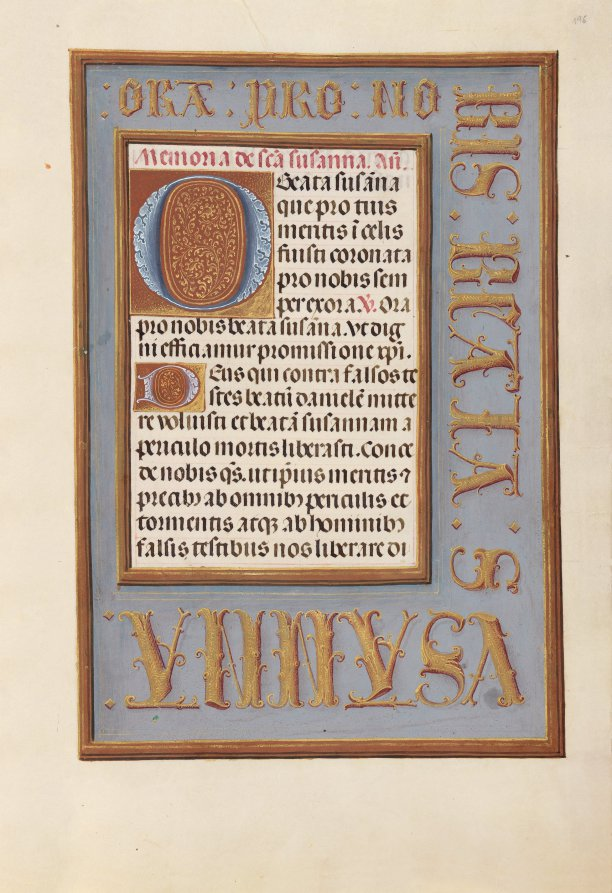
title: Hours of Queen Isabella the Catholic, Queen of Spain: Fol. 196r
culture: Flanders, Ghent and Bruges, late 15th century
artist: Master of the First Prayerbook of Maximillian (Flemish, c. 1444–1519)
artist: and Associates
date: c. 1500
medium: ink, tempera, and gold on vellum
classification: Bound Volume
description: This manuscript was illuminated by a circle of at least five highly organized manuscript painters active in the Flemish cities of Ghent and Bruges. The principal illuminator was Alexander Bening, who painted the majority of the book's miniatures. Manuscripts produced by this circle of artists are renowned for the decoration of their borders, which typically feature a rich variety of realistically-painted flowers, birds, and butterflies. This prayer book, called a book of hours, was intended not for a cleric, but for the private devotions of a lay person-in this case, Isabella the Catholic, Queen of Spain (1451-1504). Isabella's coat of arms embellishes the book's frontispiece. It is unlikely that the book was commissioned by the Queen herself; rather, she probably received it as a diplomatic gift from someone courting her patronage, perhaps Cardinal Francisco Jimenez de Cisneros. A Franciscan friar, Jimenez was dependent upon Isabella for his advancement, first to the post of Queen's confessor in 1492, and then to Archbishop of Toledo in 1495.